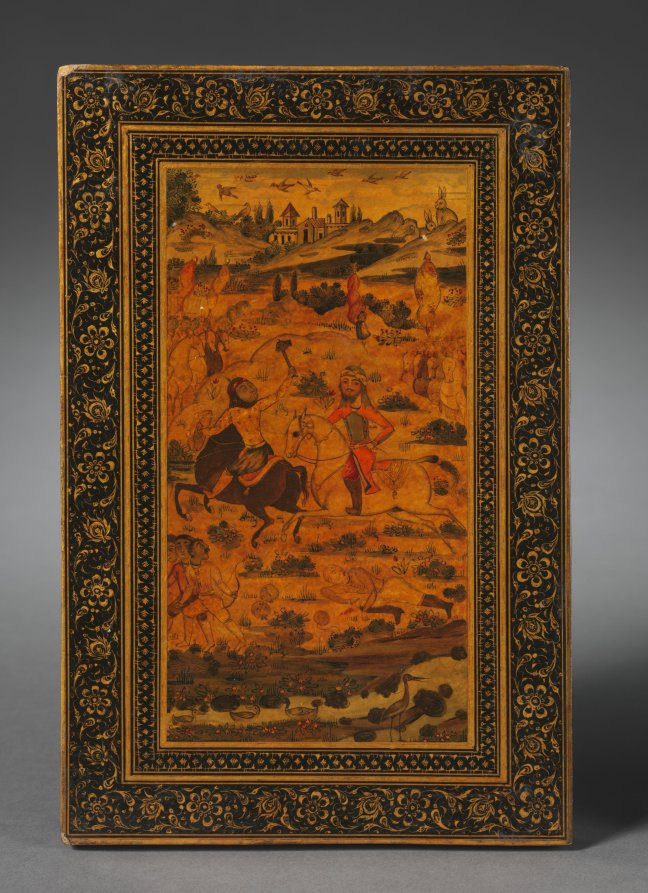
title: Mirror Case with Lid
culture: Iran, Qajar period (1779-1925)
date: 1800s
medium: Varnished lacquer and opaque watercolor over papier-mâché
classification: Lacquer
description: Love and war are the themes of the paintings on the inside and outside of this mirror case. The inside surface of the lid is painted with a royal couple seated, touching each other, within a walled garden. In front of them a female dancer performs and another pours a cup of wine. Military scenes are painted on the exterior sides; on the underside of the case enemies flee, heads roll, and a corpse lies before the victorious king and his armies.